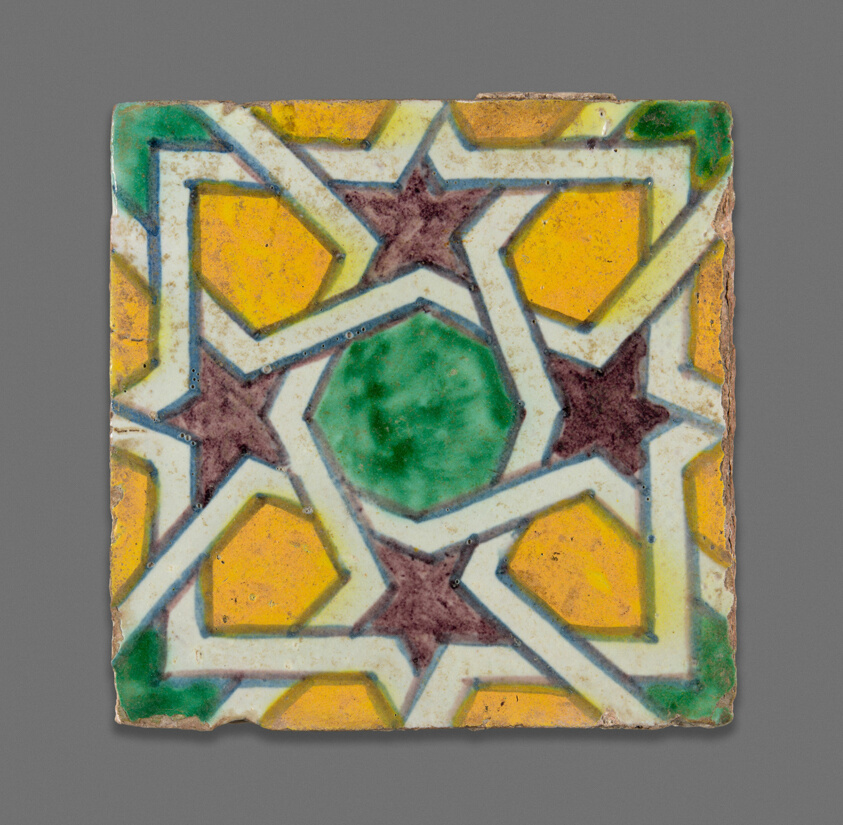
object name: Architectural fragment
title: Square Tile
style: Islamic (culture or style)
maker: Morocco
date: Late 19th century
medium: Buff pottery with polychrome painting over white glaze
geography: Morocco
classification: ceramics; fragment; asian art; decorative arts